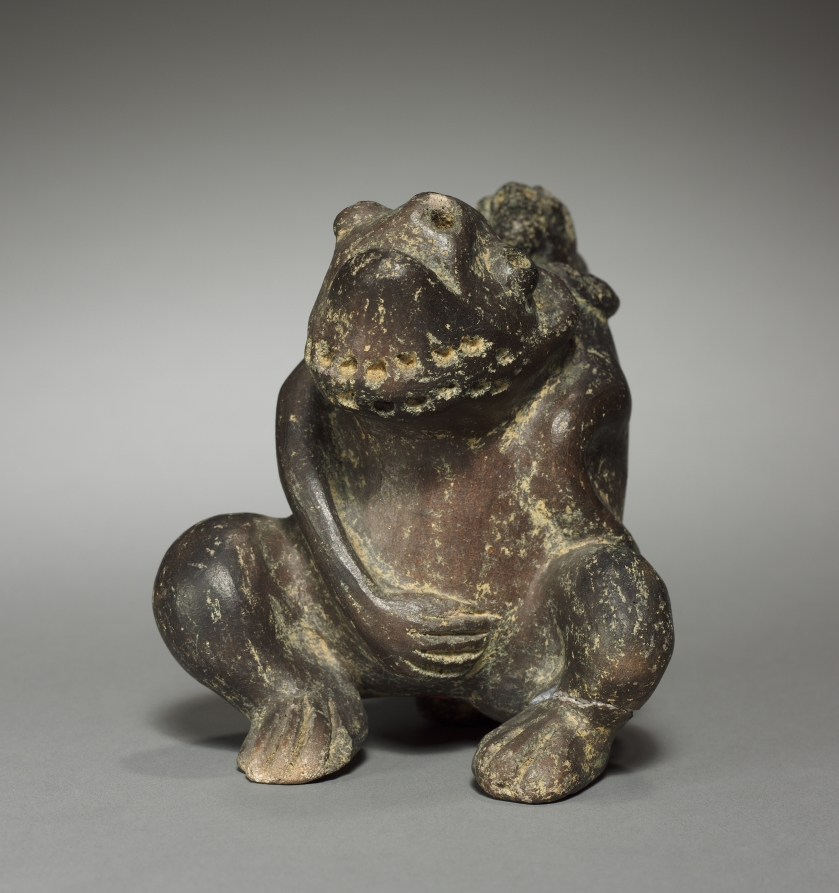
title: Jar in Shape of Grotesque Beasts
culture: Colombia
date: before 1921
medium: pottery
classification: Ceramic